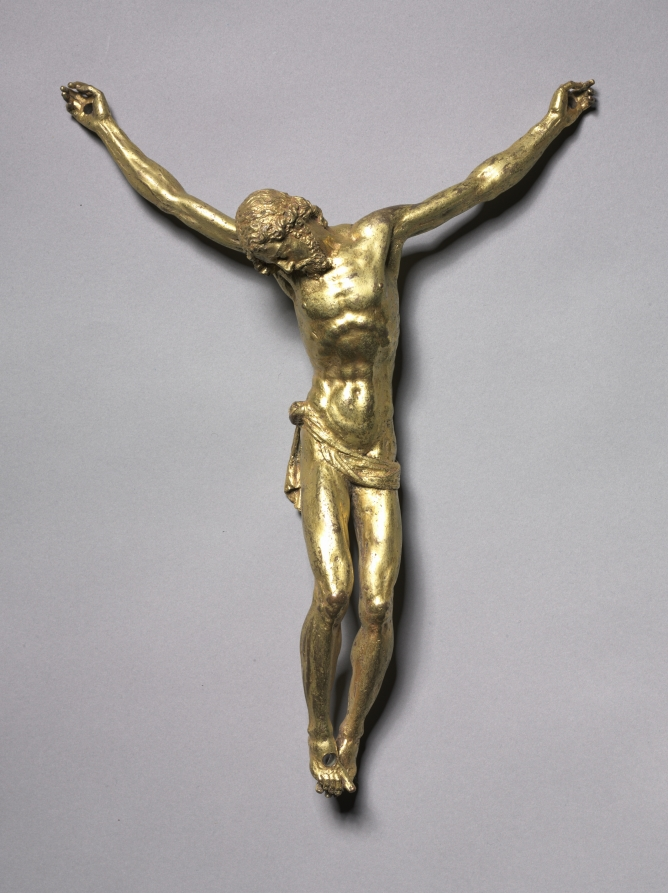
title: Crucified Christ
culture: Italy, 17th or 18th century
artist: cast after a model by Giambologna (Flemish, active Italy, 1529–1608)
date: 1600s or 1700s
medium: bronze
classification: Sculpture